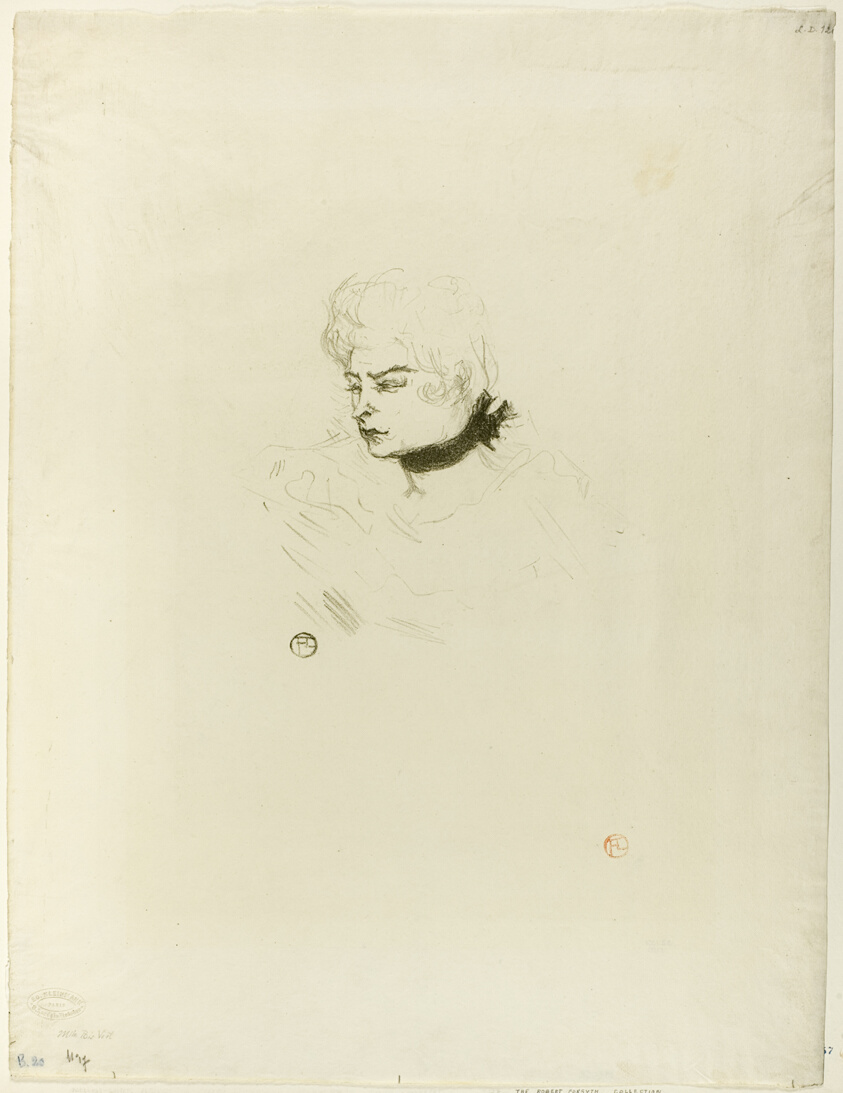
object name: Print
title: Mademoiselle Pois Vert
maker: Henri de Toulouse-Lautrec (French, 1864-1901)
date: 1895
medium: Color lithograph on cream wove paper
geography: France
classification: lithograph; print; prints and drawing